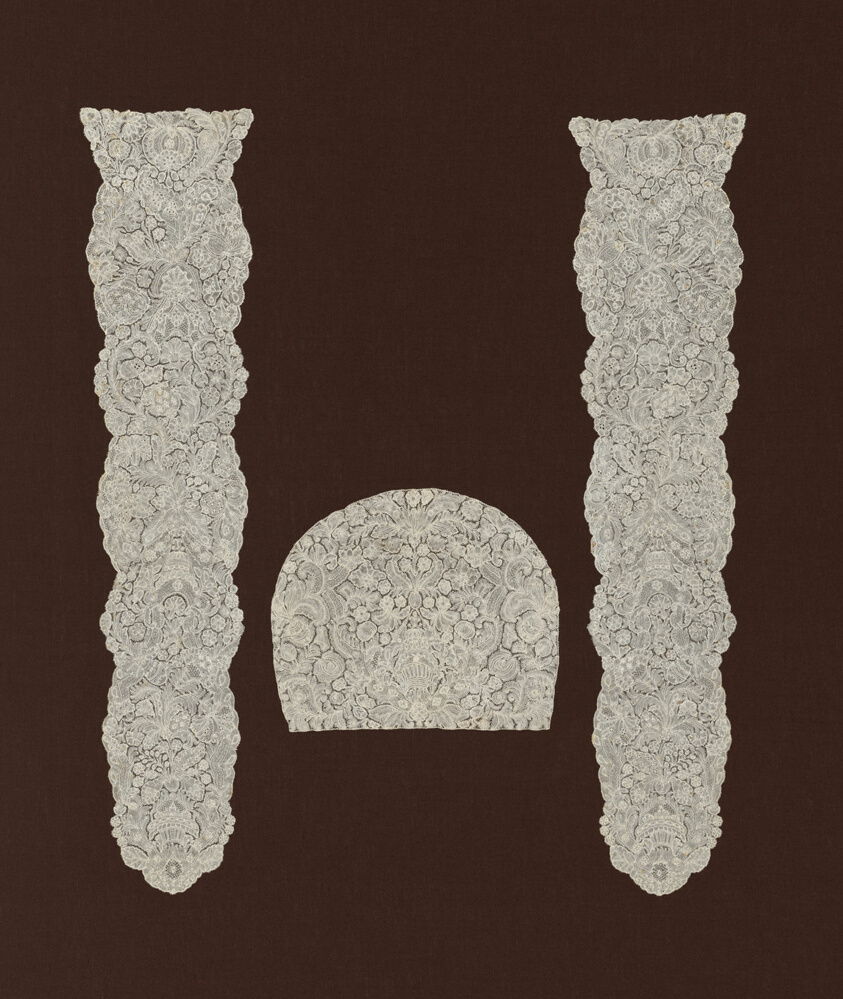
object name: Costume and Accessories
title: Lappet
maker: Flanders, Brussels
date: 1730s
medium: Linen, bobbin part lace of a type known as "Brussels" [with a twisted bar ground?]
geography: Brussels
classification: costume accessory; lace - bobbin; textile; costume; costume accessory - headdress; costume accessory worn above the waist